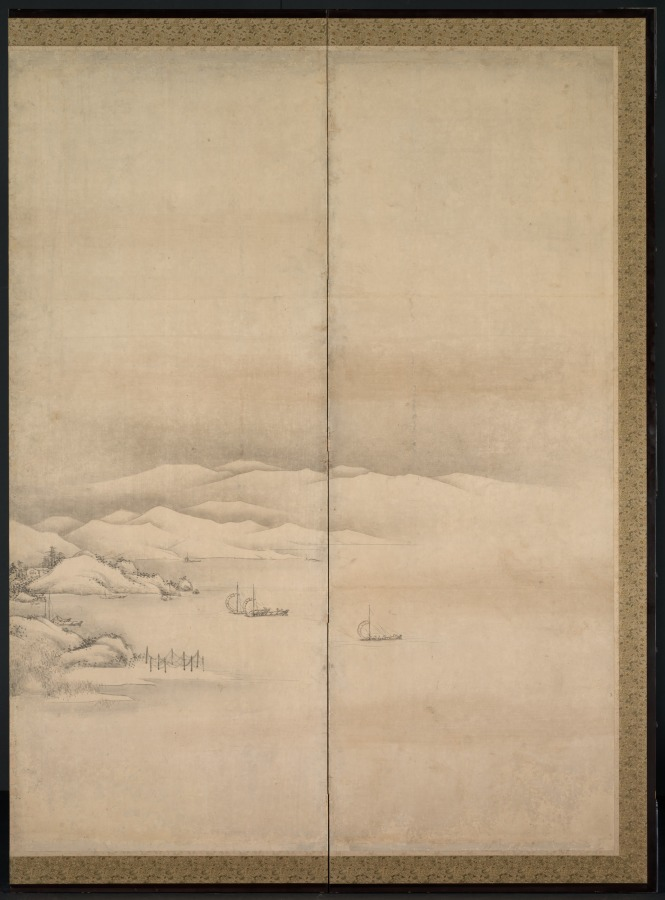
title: Chinese Landscape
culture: Japan, Muromachi period (1392–1573)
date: 1500s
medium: One of a pair of six-fold screens; ink and slight color on paper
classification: Painting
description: In a panorama of mountains and expanses of water, three gentlemen have assembled by moonlight to enjoy one another’s company away from a bustling village. An influx of ink paintings from China in both album and scroll formats beginning in the late 1200s inspired Japanese artists to create landscapes based upon Chinese prototypes. Later, Japanese painters adapted the imagery to the larger format of folding screens, which were used to define spaces in large rooms.